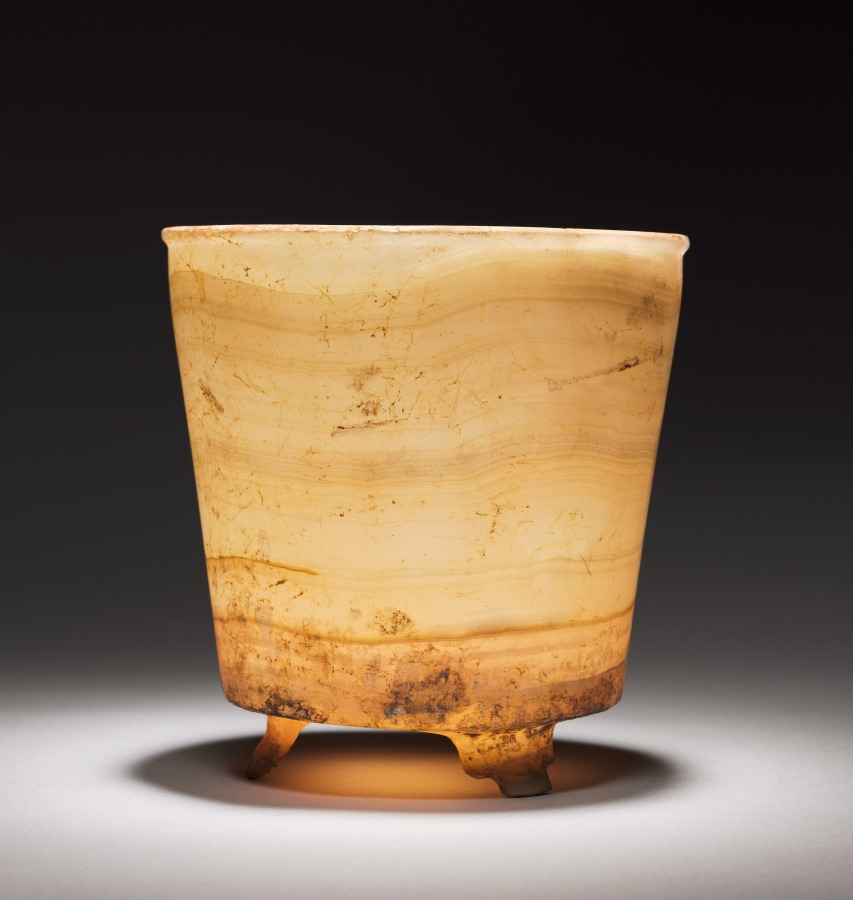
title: Offering Group: Vessel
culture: Mexico, Guerrero(?), San Jerónimo de Juárez, Xochicalco style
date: c. 800–1200(?)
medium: travertine or tecali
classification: Sculpture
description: The objects in this group, all with traces of red pigment, are said to have been found together, the shells and greenstone plaque inside the translucent stone vessel. A similar offering was found in a pyramid ornamented with feathered serpents at Xochicalco, a site south of the Valley of Mexico.